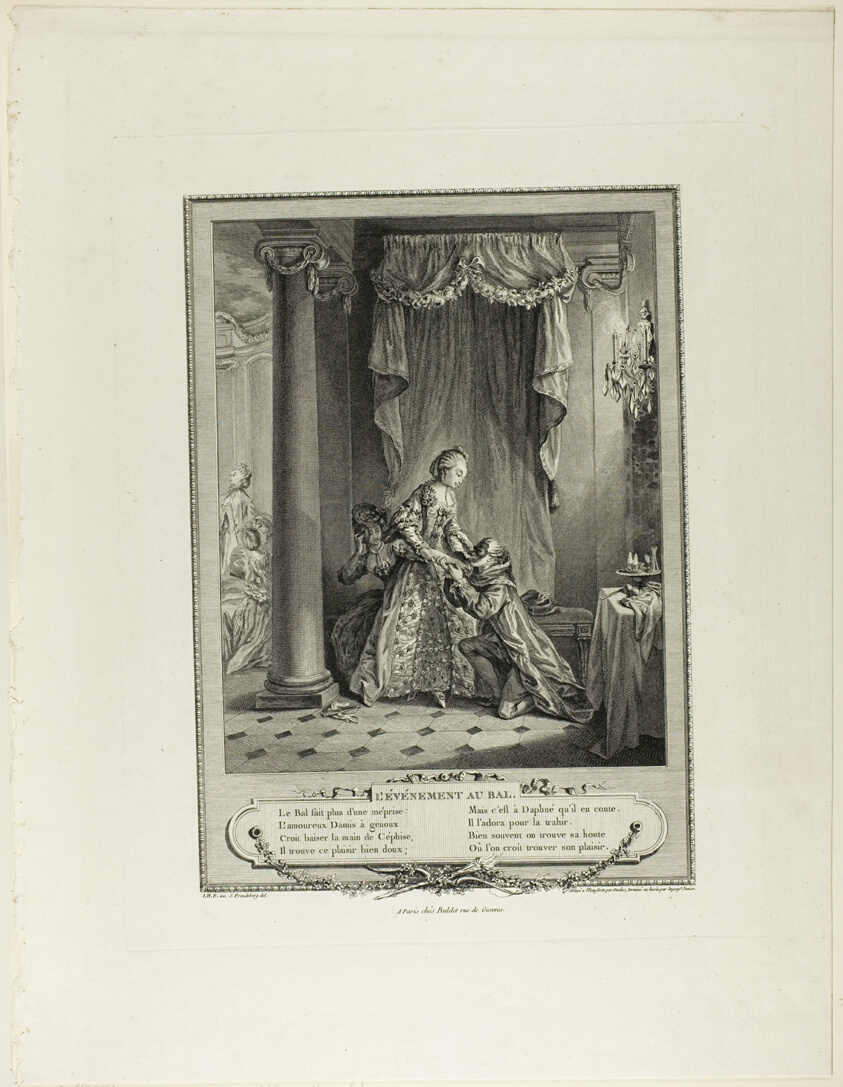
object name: Print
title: The Event at the Ball, from Monument du Costume Physique et Moral de la fin du Dix-huitième siècle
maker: Antoine-Jean Duclos (French, 1742-1795) and Francois Robert Ingouf (French, 1747-1812); after Sigmund Freudeberg (Swiss, 1745-1801) and Jean Henri Eberts (Swiss, 18th century); published by Laurent-François Prault (French 1712-1780)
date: 1774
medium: Engraving on paper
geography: France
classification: etching; print; prints and drawing